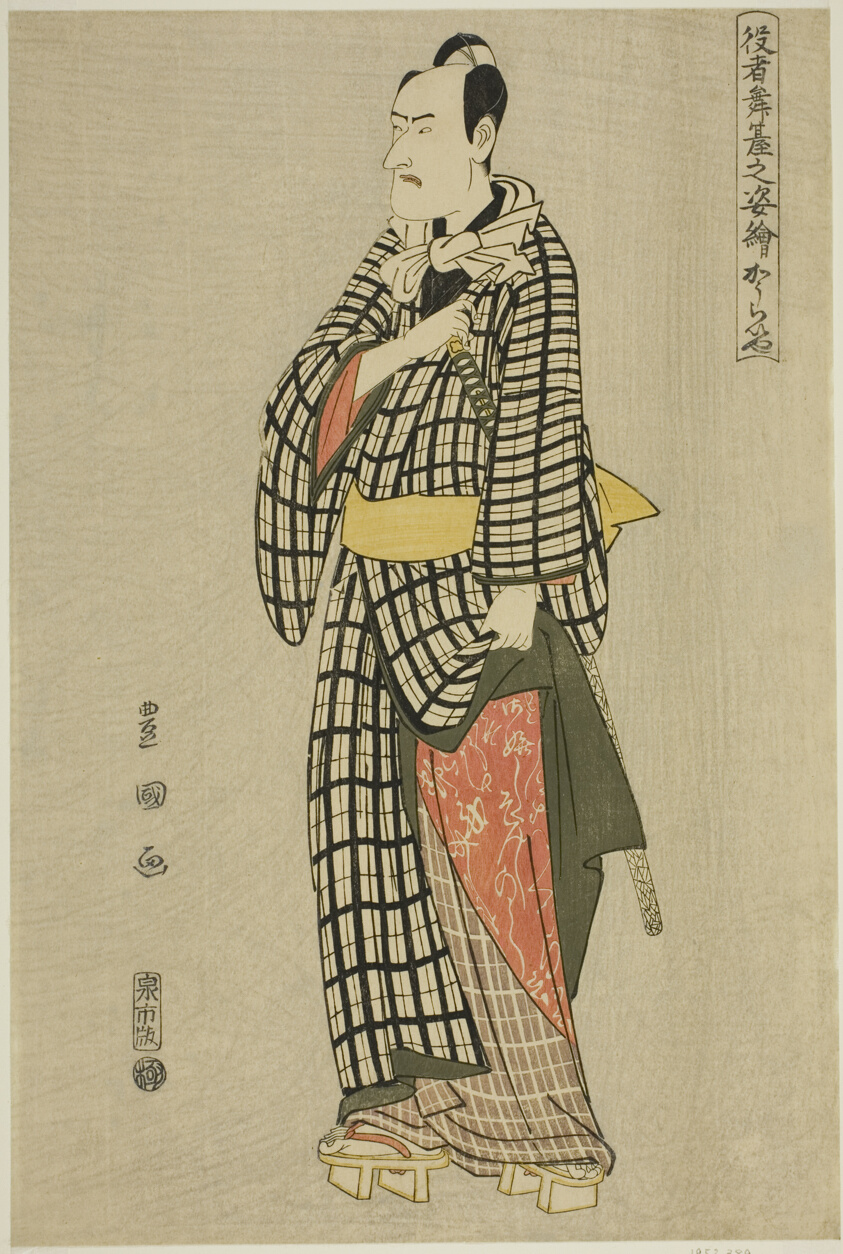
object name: Print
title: Koraiya: Ichikawa Komazo III, from the series "Portraits of Actors on Stage (Yakusha butai no sugata-e)"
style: Japanese (culture or style)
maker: Utagawa Toyokuni I 初代 歌川 豊国; Japanese, 1769–1825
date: c. 1794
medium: Color woodblock print; oban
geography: Japan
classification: woodblock print; print; asian art